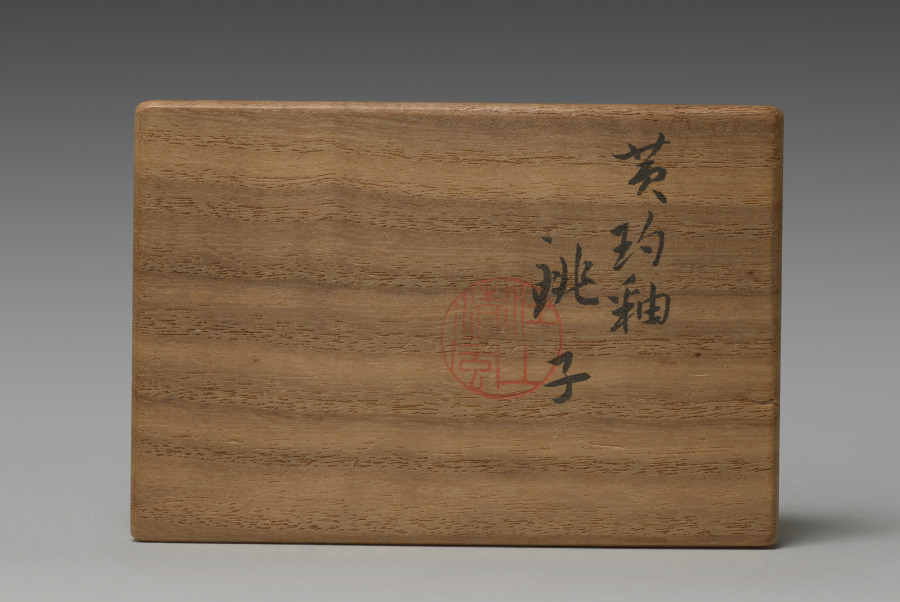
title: Sake Pourers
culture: Japan, Taishō period (1912–26) or Shōwa period (1926–89)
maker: Seifū Yohei IV (Japanese, 1872–1951)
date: 1914–46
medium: Pair of sake pourers; porcelain with yellow glaze and bamboo handles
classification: Ceramic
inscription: 清風造 。 【印】 清風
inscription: 成山清風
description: Like his father, Yohei IV also produced works with red or yellow monochrome glazes. His yellow-glazed works include this pair of sake pourers, a set of five drinking cups CMA 2022.217, and a sweets bowl molded into the shape of a chrysanthemum CMA 2022.218.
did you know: The lid's handle is made of bamboo.